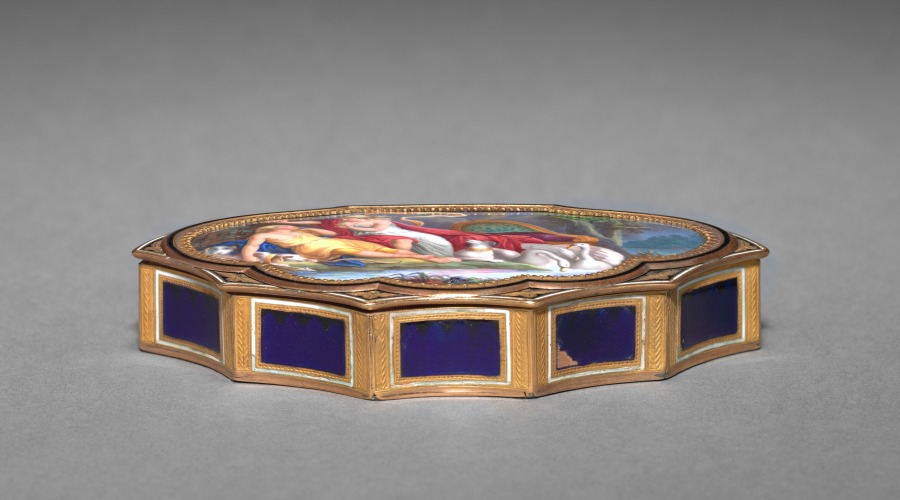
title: Box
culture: Switzerland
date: early 1800s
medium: gold and enamel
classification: Enamel